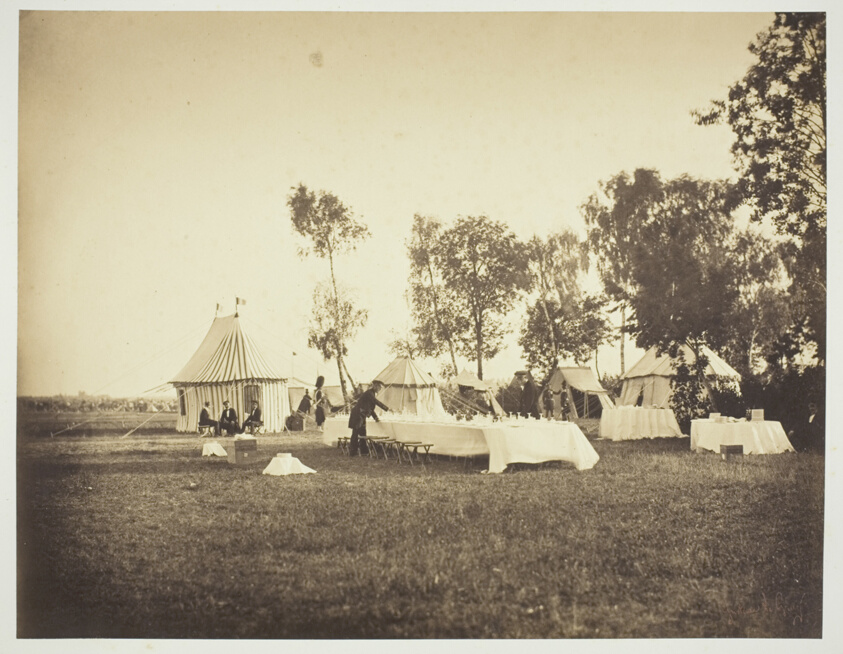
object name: Photograph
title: Preparation of the Emperor's Table, Camp de Châlons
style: 19th century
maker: Gustave Le Gray (French, 1820–1884)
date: 1857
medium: Albumen print, from the album "Souvenirs du Camp de Châlons"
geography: France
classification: albumen silver print; photographic process; photography; photograph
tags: Paris